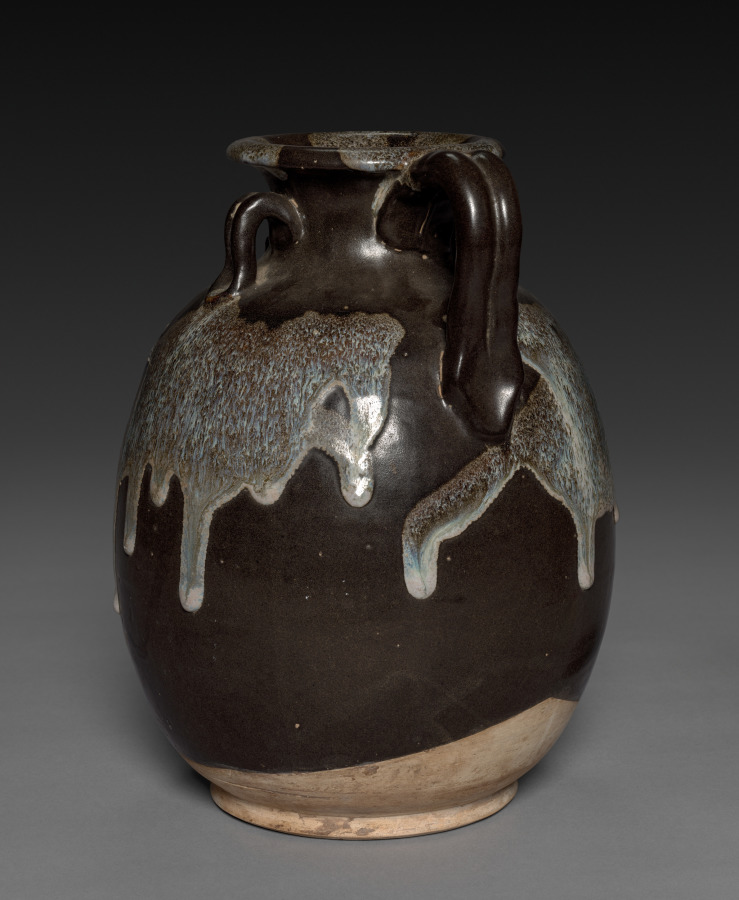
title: Ewer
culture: China, Tang dynasty (618–907)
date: 618–907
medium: Glazed stoneware, Huangdao ware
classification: Ceramic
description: The splashes of color on the dark glaze were achieved by sprinkling the wood ash on the black-brown glaze before firing. This local ware may be considered a predecessor of Jun ware, which was produced in the same region and was sometimes decorated by splashing.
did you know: This vessel was made during the Tang Dynasty, a golden age of culture.